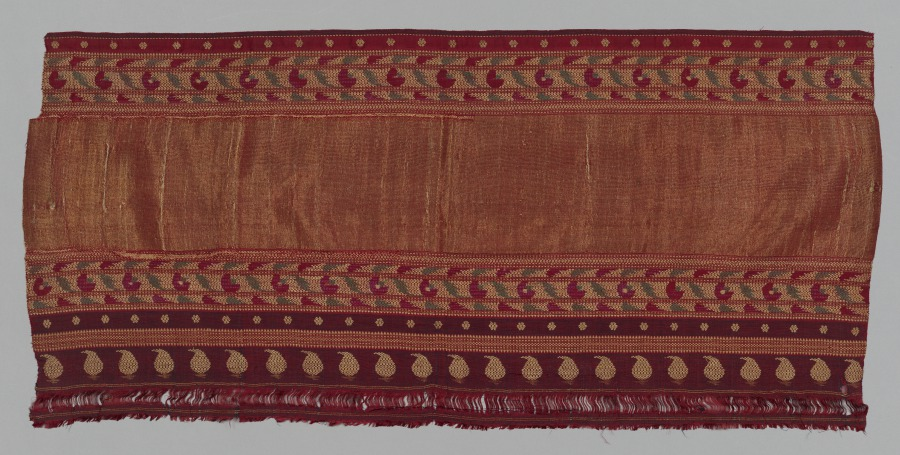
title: Part of a Sari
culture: India, 19th century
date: 1800s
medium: brocade (?)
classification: Textile